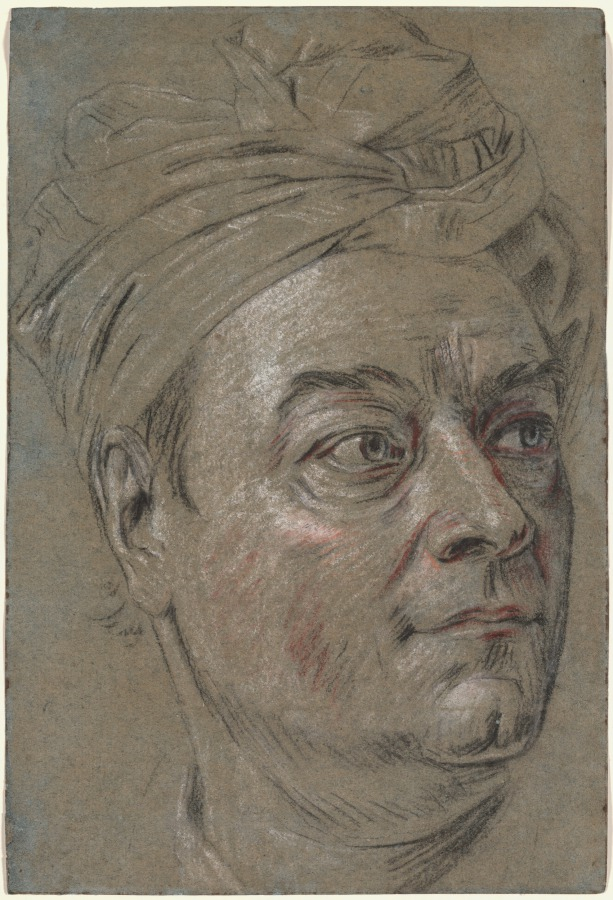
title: Jacques Dumont, called Le Romain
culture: France, 18th century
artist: Maurice Quentin de La Tour (French, 1704–1788)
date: c. 1742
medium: black and white chalk with pastel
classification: Drawing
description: Maurice Quentin de La Tour specialized in portraiture, and was praised by his contemporaries for creating uncanny likenesses of his sitters. He often created these works using pastel, a rich and powdery drawing material. He took up the technique for this quickly drawn sketch, created directly in front of his friend, the painter Jacques Dumont. La Tour used the drawing as a guide for Dumont's face in two different large-scale portraits in pastel, one of which is in the Louvre in Paris. During the 1800s this sheet was owned by Edmond and Jules de Goncourt, the brothers who, as writers and intellectuals, championed the art of 18th-century France and helped to revive interest in La Tour and other artists from that period.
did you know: This drawing resembles two pastel portraits that Maurice Quentin de La Tour made of Jacques Dumont during the 1740s, but one work shows the sitter about to paint, while the other shows him playing a guitar.